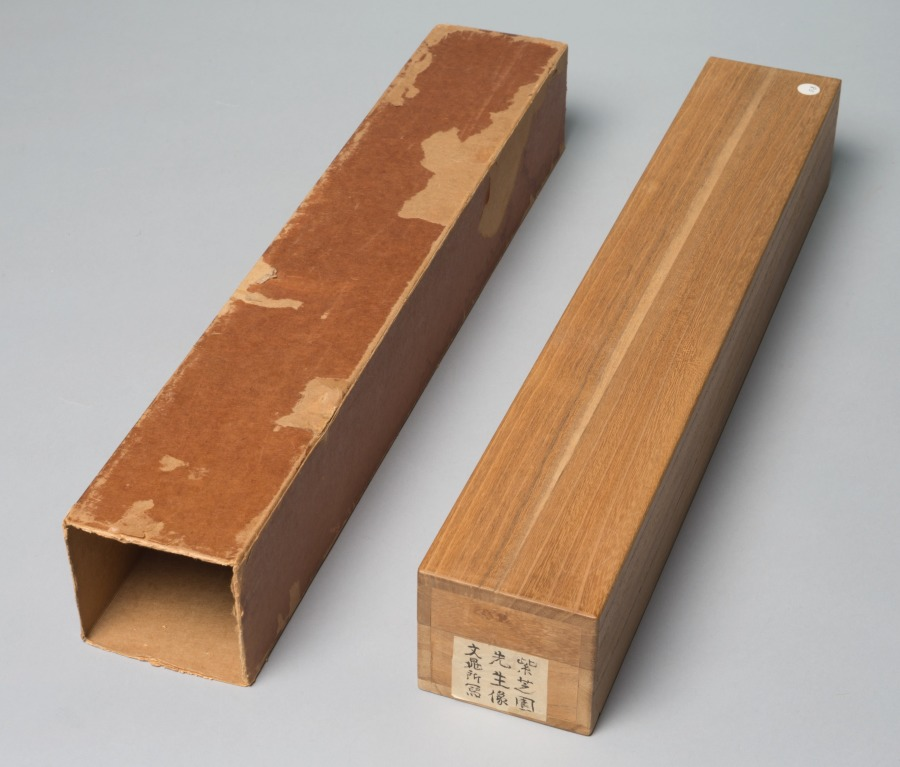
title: Imaginary Portrait of Shundai Dazai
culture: Japan, Edo period (1615–1868)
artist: Tani Bunchō (Japanese, 1763–1841)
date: late 1700s–1800s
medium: hanging scroll; ink and color on paper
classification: Painting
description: Shundai (1680–1747) was a noted Confucian scholar and writer. Brought up with a strongly Confucian family background, Bunchō’s veneration for Shundai is understandable. The inscription is by Nozawa Hikoroku, a scholar and poet contemporary with Bunchō.